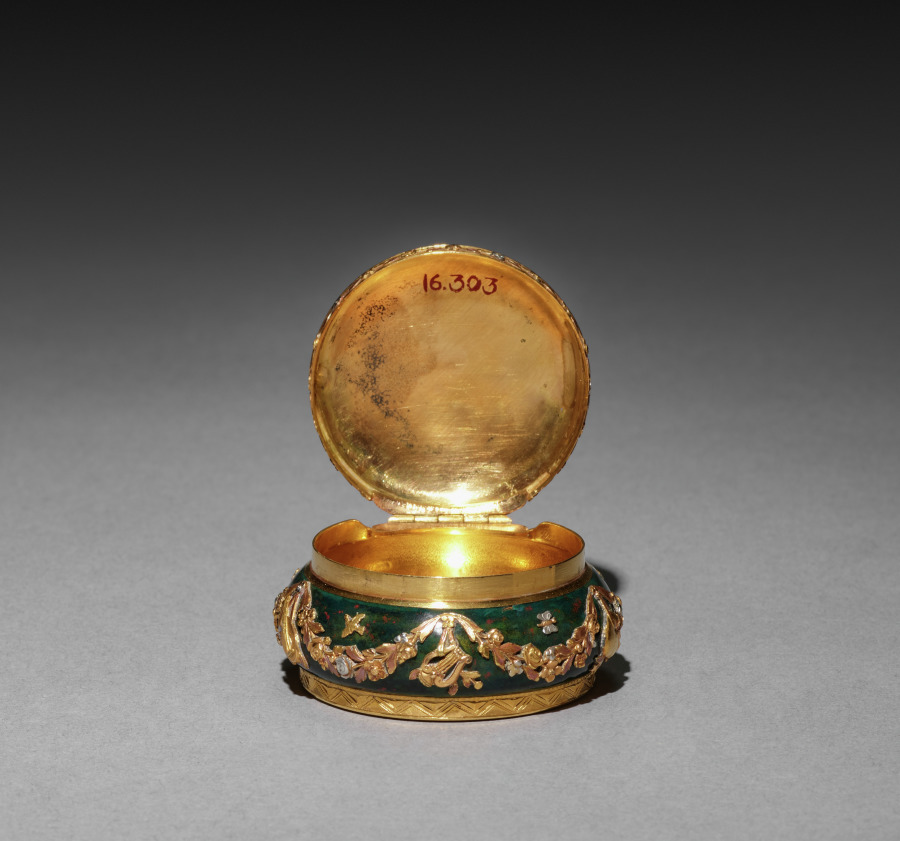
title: Bonbonniere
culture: France, 19th century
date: 1850–1899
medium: bloodstone (?) mounted in colored golds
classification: Miscellaneous